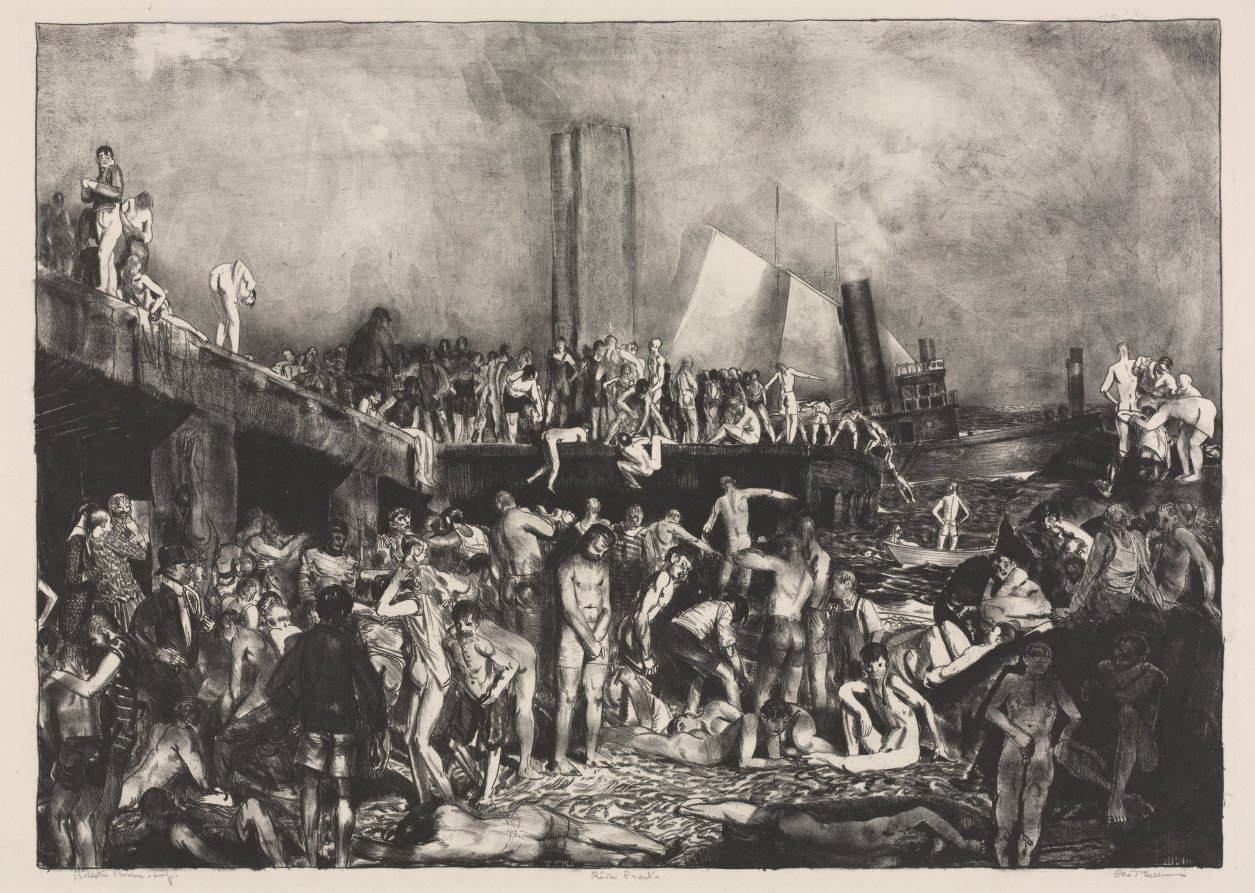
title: River-Front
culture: America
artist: George Bellows (American, 1882–1925)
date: 1924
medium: lithograph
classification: Print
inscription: In graphite, lower right, recto: "Geo. Bellows"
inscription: In graphite, center, recto: "River Front"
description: During George Bellows’s first decade in New York City, starting in 1904, newspapers ran many stories about the “social problem” of the urban poor, reporting that the city’s tenement district lacked cleanliness and order. Drawn to this unvarnished side of city life, Bellows made several images of the public docks along the East River that were unofficial places of recreation for the city’s tenement children. Both Splinter Beach and River-Front feature, without sentimentality, children that display their nakedness unabashedly. Disturbingly, both images feature fully clothed adults observing or even touching children, as well as other sexual touching. Portrayals of sexual indecency in Bellows’s work aligned with the off-color humor often found in fictional representations of the urban poor of the time.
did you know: Bellows created a dynamic triangle in this composition with the verticality of the central boy and lone building, the horizontal of the tugboat, and the two sails that complete the shape.